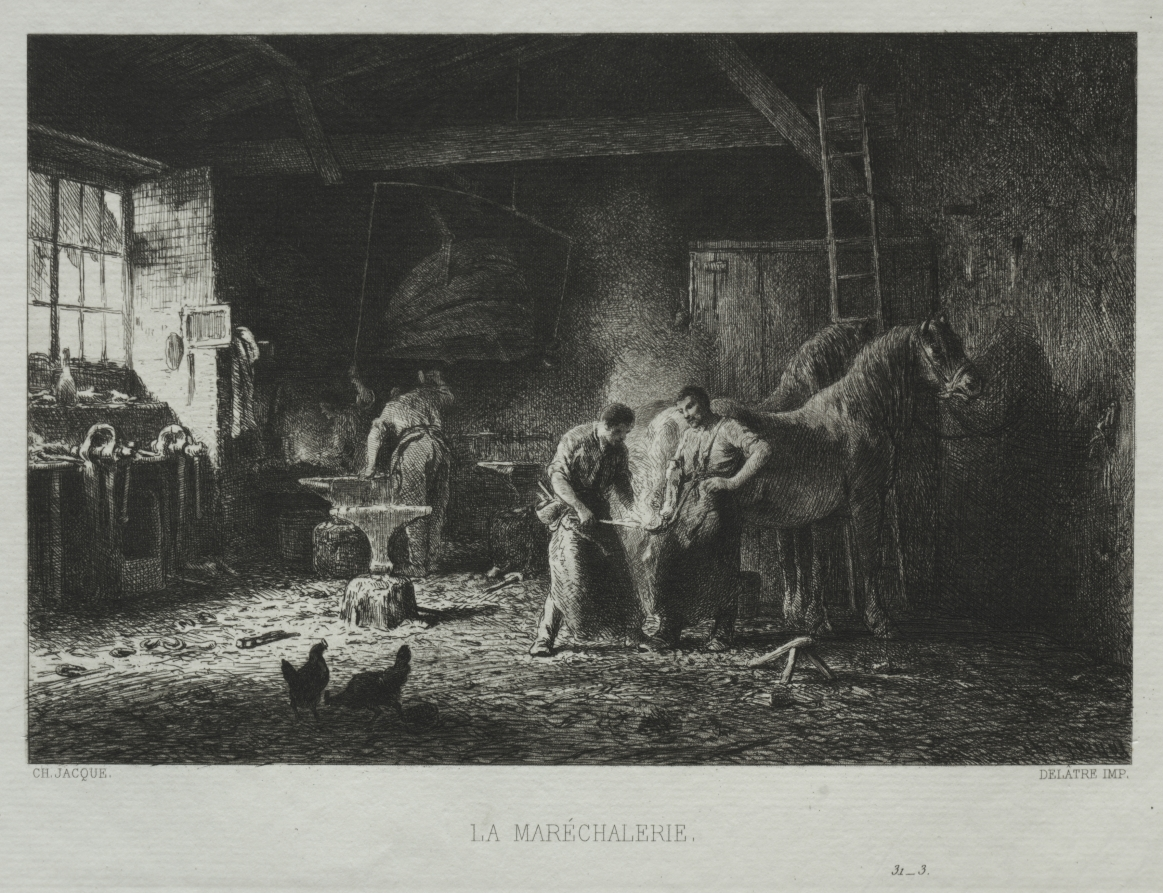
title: The Blacksmith Shop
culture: France, 19th century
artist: Charles-Émile Jacque (French, 1813–1894)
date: 1865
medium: etching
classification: Print